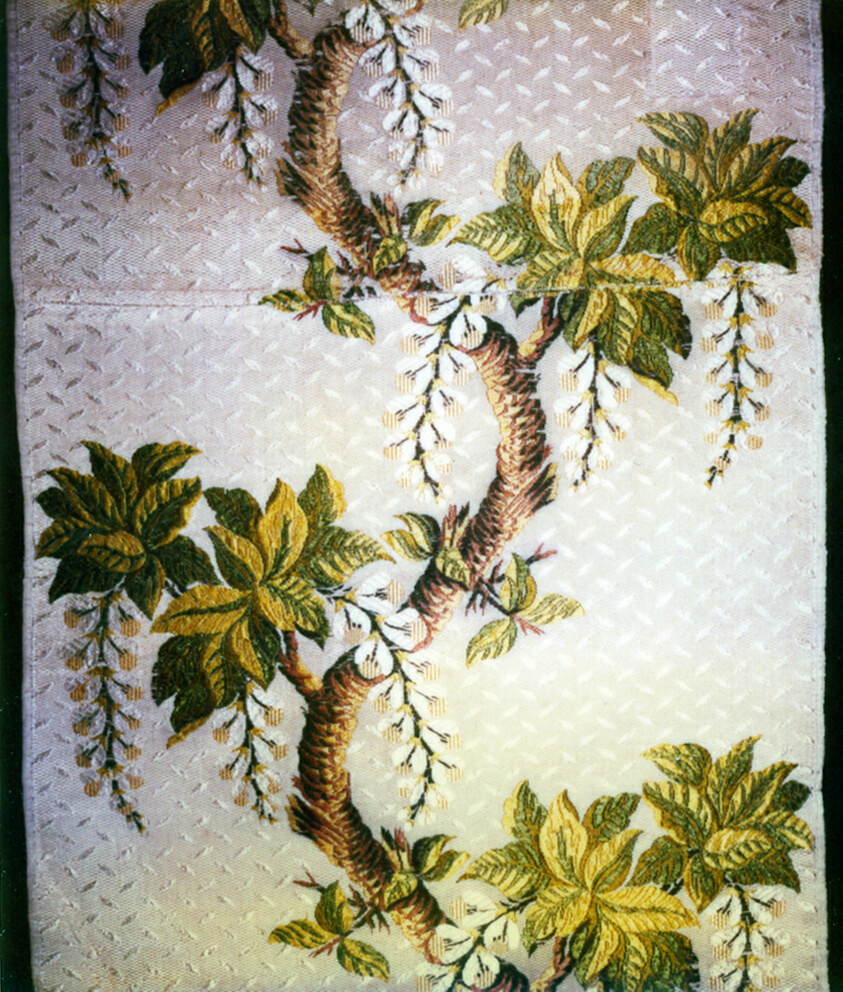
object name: Textile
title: Panel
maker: France, Lyon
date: 1750/75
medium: Silk, plain weave with supplementary patterning warps and supplementary patterning and brocading wefts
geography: France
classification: textile; weaving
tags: trees, foliage